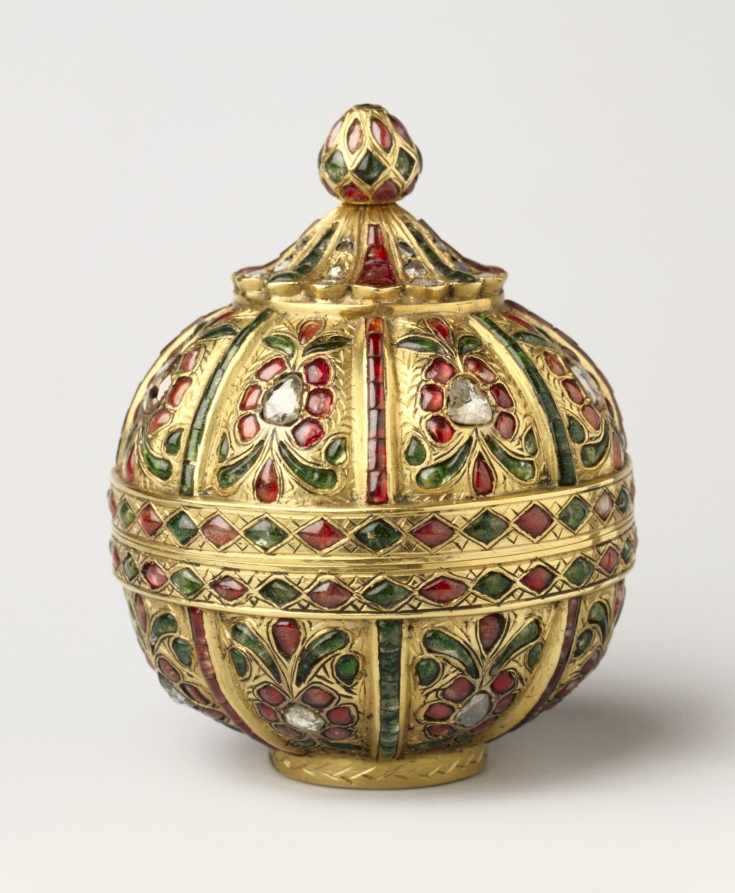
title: Globular-Shaped Box Decorated with Gems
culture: India, Mughal dynasty (1526-1756)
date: 1700s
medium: gold paste and clear and colored rock crystal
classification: Metalwork